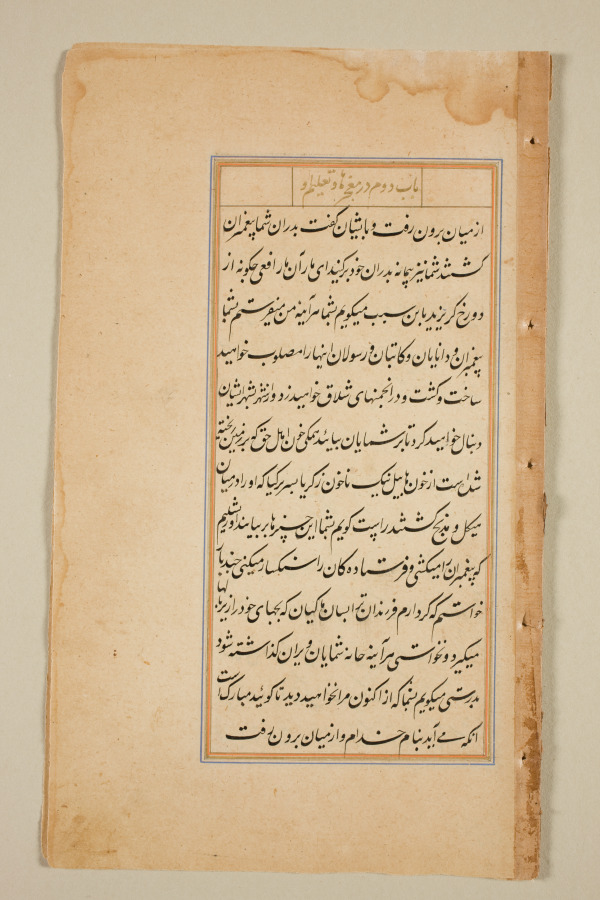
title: Text page from a Mirror of Holiness (Mir’at al-quds) of Father Jerome Xavier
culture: Mughal India, Allahabad, made for Prince Salim (1569–1627)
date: 1602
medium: Ink and gold on paper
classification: Manuscript